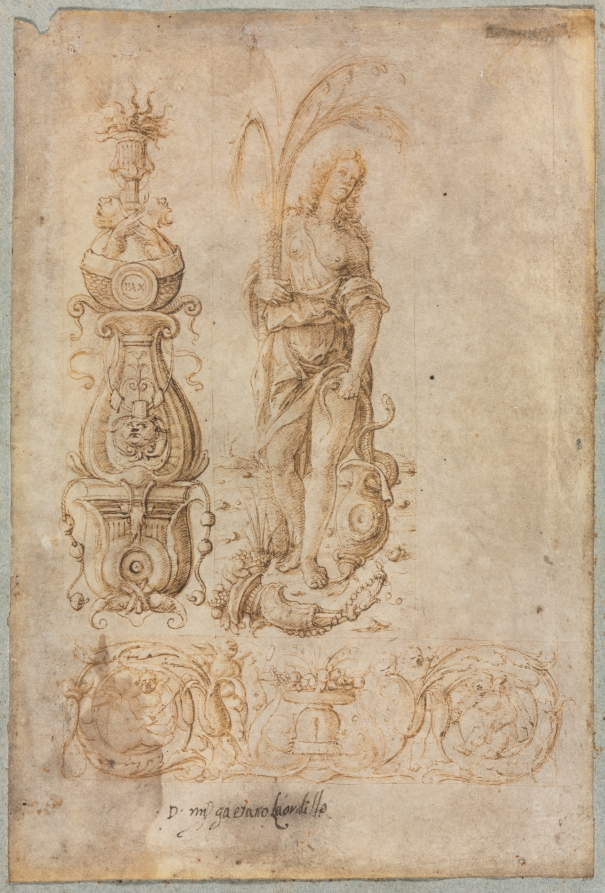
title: Design for a Candelabrum, Allegorical Figure of Abundance, Ornamental Relief Design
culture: Italy, late 15th century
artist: Bernardo Parentino (Italian)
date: c. 1490s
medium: pen and brown ink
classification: Drawing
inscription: Lower center: D . mi[o?] [likely an abbreviation for "Maestro"] gaetano Laordillo (brown ink)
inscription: Verso of secondary support, upper right: -[1?]9- (brown ink) center left: 65 (graphite)